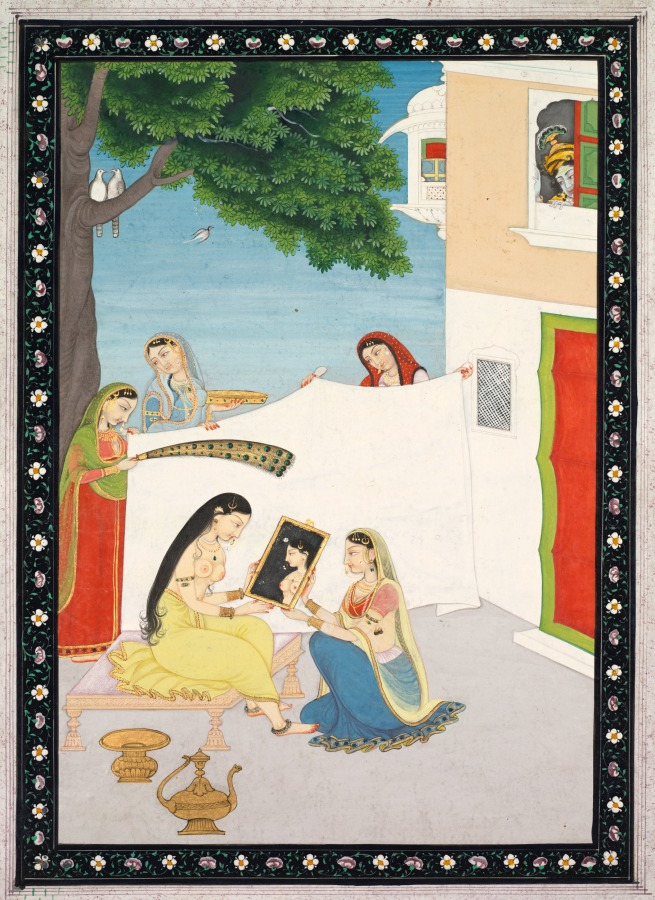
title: Toilette of Radha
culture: Northern India, Pahari kingdoms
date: c. 1810–20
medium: Gum tempera and gold on paper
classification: Painting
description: Krishna spies on his beloved Radha as she dresses for the day. An attendant holds a mirror for her, while others hold a sheet and a whisk of peacock feathers. Such a poetic scene suggests that even in our most private and intimate moments, god can see us.